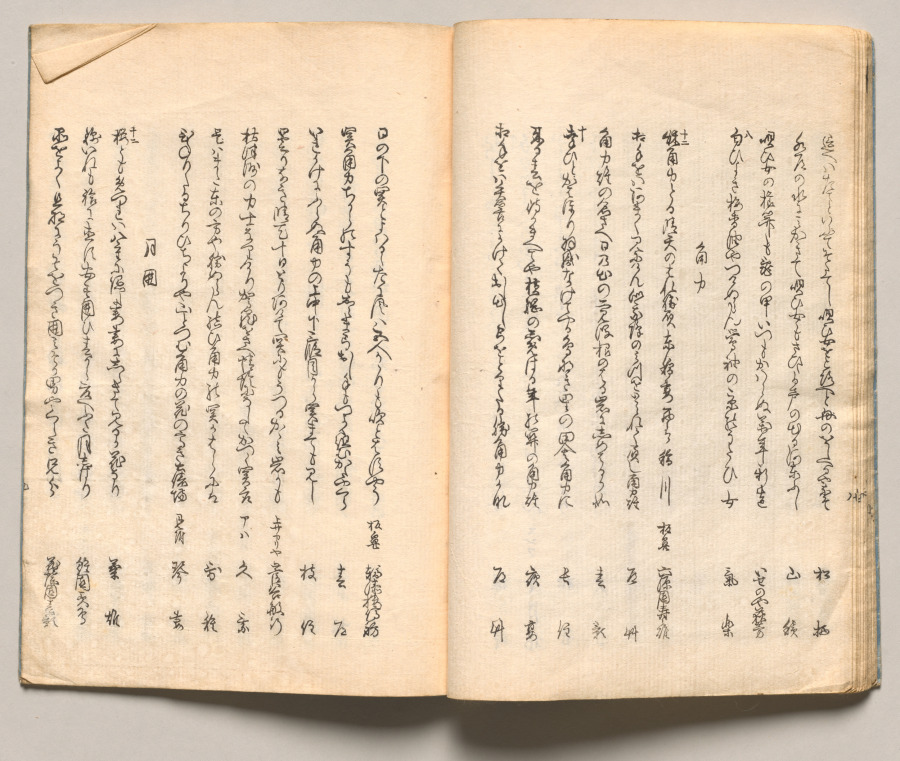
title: Spread Eighteen from Volume One of People of Japan in Light Verse (Kyōka)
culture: Japan, Edo period (1615–1868)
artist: Utagawa Hiroshige (Japanese, 1797–1858)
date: 1857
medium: Woodblock-printed book; ink and color on paper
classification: Bound Volume